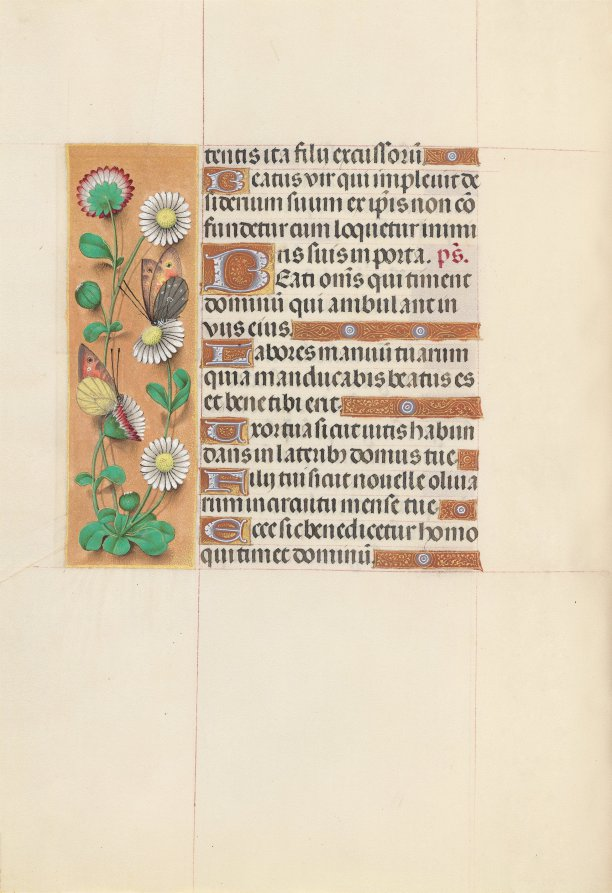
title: Hours of Queen Isabella the Catholic, Queen of Spain: Fol. 143v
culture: Flanders, Ghent and Bruges, late 15th century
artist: Master of the First Prayerbook of Maximillian (Flemish, c. 1444–1519)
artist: and Associates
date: c. 1500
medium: ink, tempera, and gold on vellum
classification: Bound Volume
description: This manuscript was illuminated by a circle of at least five highly organized manuscript painters active in the Flemish cities of Ghent and Bruges. The principal illuminator was Alexander Bening, who painted the majority of the book's miniatures. Manuscripts produced by this circle of artists are renowned for the decoration of their borders, which typically feature a rich variety of realistically-painted flowers, birds, and butterflies. This prayer book, called a book of hours, was intended not for a cleric, but for the private devotions of a lay person-in this case, Isabella the Catholic, Queen of Spain (1451-1504). Isabella's coat of arms embellishes the book's frontispiece. It is unlikely that the book was commissioned by the Queen herself; rather, she probably received it as a diplomatic gift from someone courting her patronage, perhaps Cardinal Francisco Jimenez de Cisneros. A Franciscan friar, Jimenez was dependent upon Isabella for his advancement, first to the post of Queen's confessor in 1492, and then to Archbishop of Toledo in 1495.